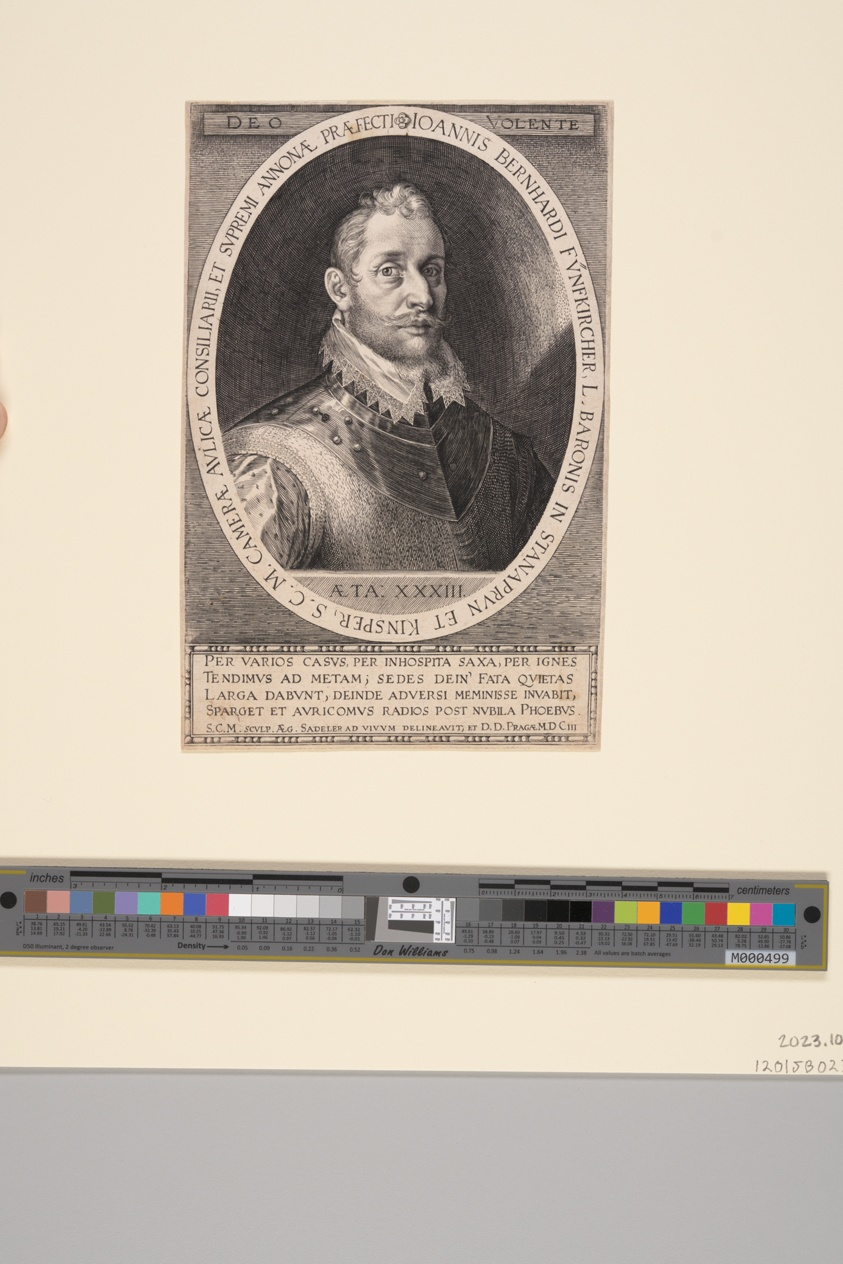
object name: Print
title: Johannes Bernhardt Fünfkircher, Baron of Stanaprun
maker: Aegidius Sadeler II; Flemish, c. 1570–1629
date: 1603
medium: Engraving on paper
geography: Flanders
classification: engraving; paper; print; prints and drawing